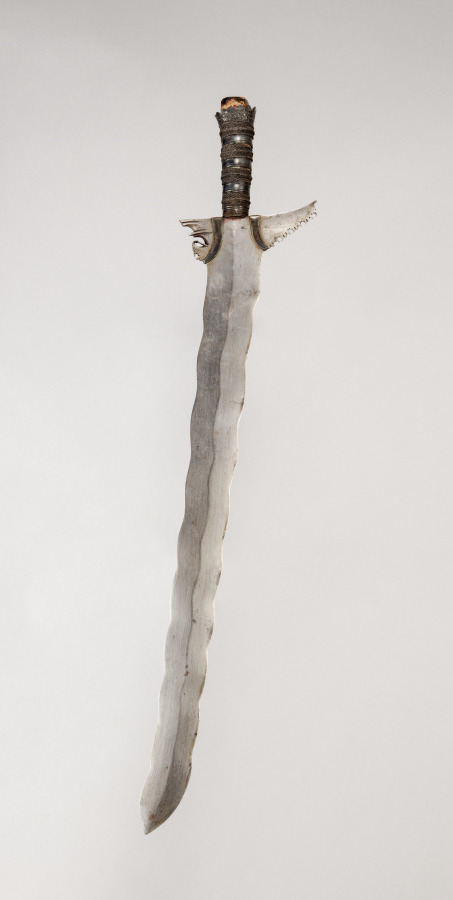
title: Sword (Kalis or Sundang)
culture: Philippines, Mindanao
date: before 1916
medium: Blade: metal; handle: metal with silver wire; pommel: silver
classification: Arms and Armor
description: The kalis is one of the most recognizable bladed weapons of Muslim Mindanao and the Sulu Archipelago and was both a weapon and a symbol of rank and honor. This long, double-edged steel blade features continuous undulations from base to tip. Among the Maranao and Maguindanao people, sword making was a specialized craft requiring collaboration among blacksmiths (panday), carvers, and metalsmiths.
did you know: The undulating blade is thought to embody spiritual potency and the dynamic flow of energy.